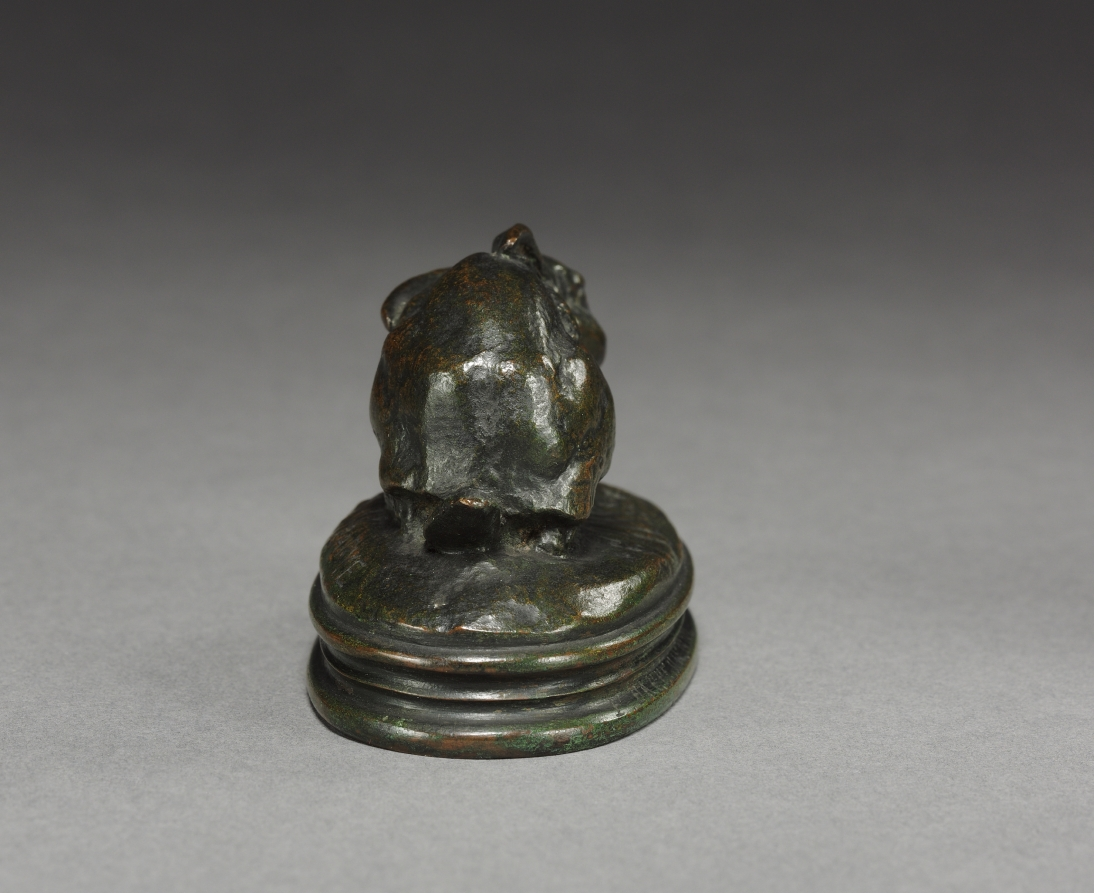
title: Hare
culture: France, 19th century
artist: Antoine-Louis Barye (French, 1796–1875)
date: c. 1830 – 1875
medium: bronze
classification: Sculpture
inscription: Signed on base top rear: "Barye"